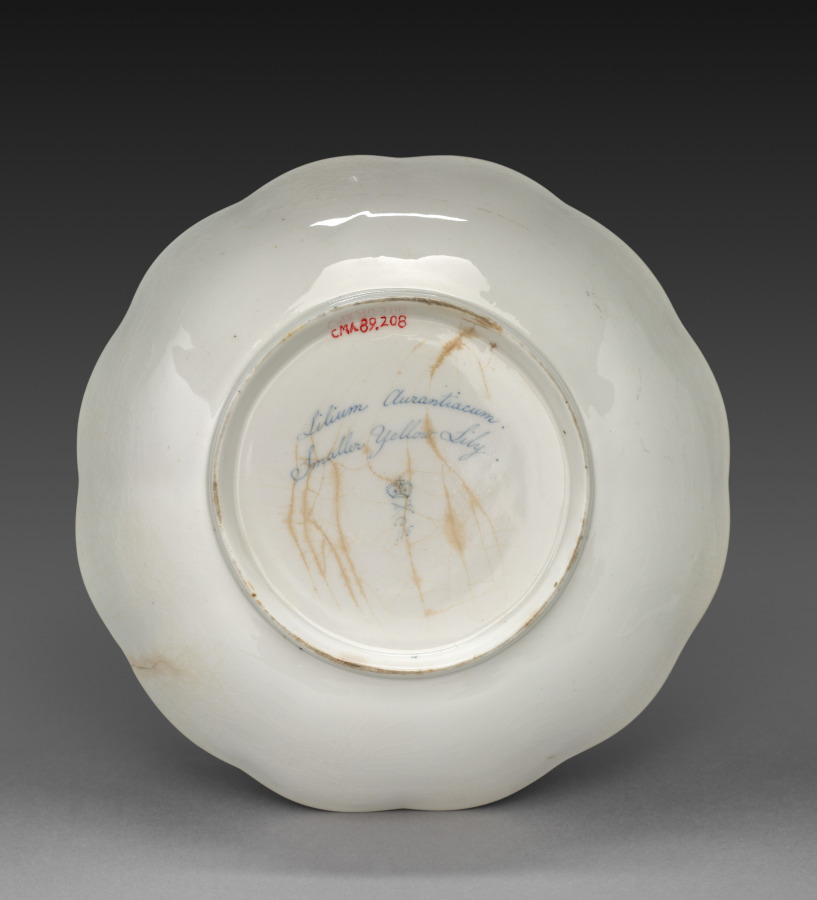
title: Bowl from Dessert Service: Smaller Yellow Lily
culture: England, Derby, 18th century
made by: Derby (Crown Derby Period) (British)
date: c. 1800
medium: porcelain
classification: Ceramic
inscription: inscribed in blue on back: Lilium Aurantiacum. Smaller Yellow Lily./crown/crossed batons and dots/D/115. Near edge: 9.